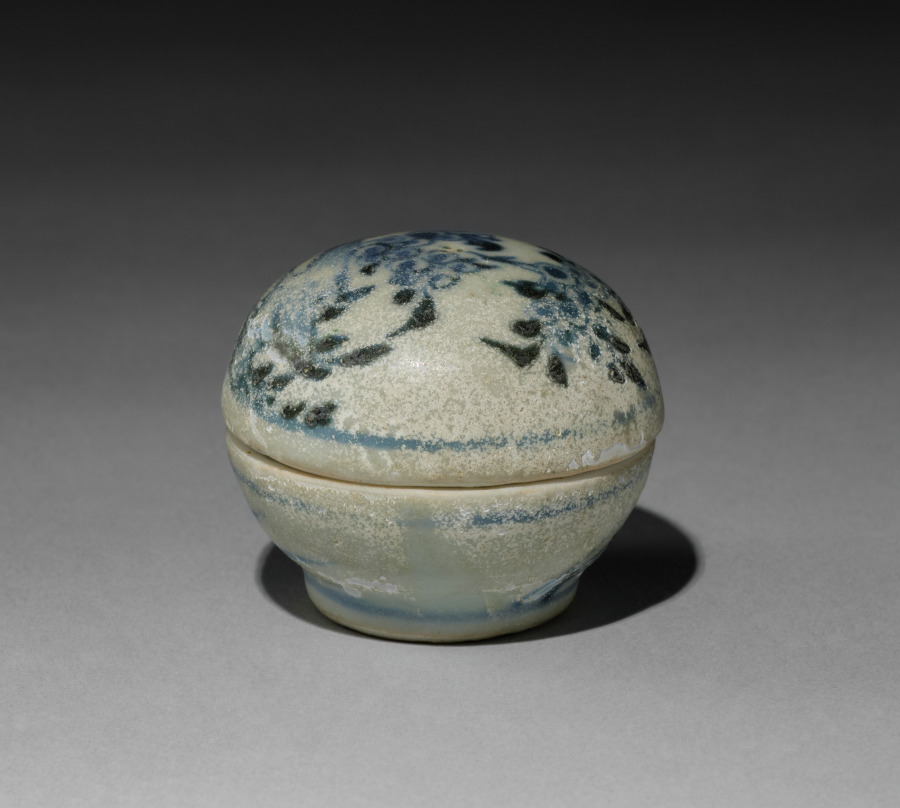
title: Pill Box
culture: China, Qing dynasty (1644-1911)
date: c. 1752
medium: porcelain with blue and white decoration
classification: Ceramic